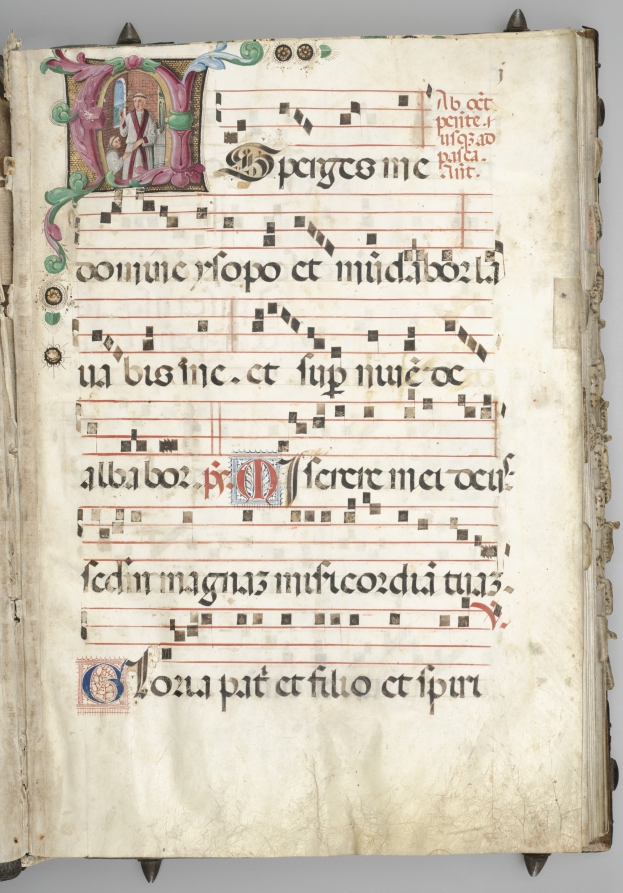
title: Gradual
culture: Italy, Verona(?)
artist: circle of Girolamo dai Libri (Italian, 1474–1555)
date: c. 1520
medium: ink, tempera, and gold on parchment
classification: Manuscript